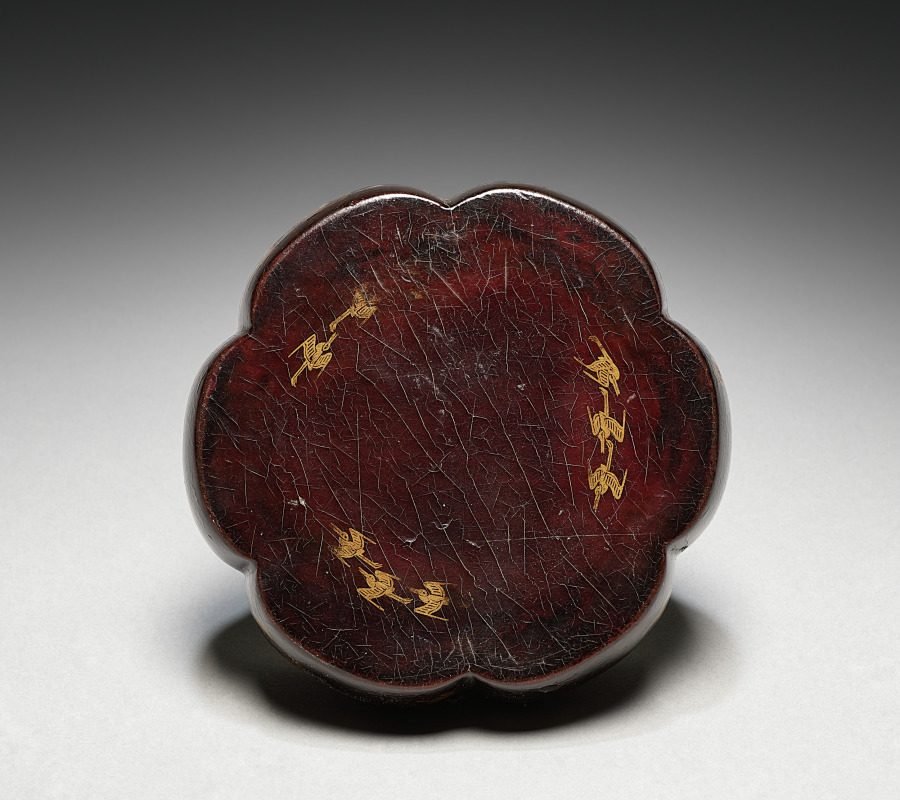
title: Incense Burner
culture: Japan, Nanbokuchō period (1336–92)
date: late 1300s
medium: black lacquer on wood with decoration in maki-e; metal rims; bronze lid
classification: Lacquer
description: This container's repeated, undulating, rounded sides evoke waves over which the articulated plovers sweep. The bronze cover (probably a later addition) mimics the design of a fishing weir. Overall, the container brings to mind the seashore. The earthy quality of the lacquered surface demonstrates the interaction between a man-made pattern (the plovers) and the somewhat unexpected surface of a natural material such as wood.